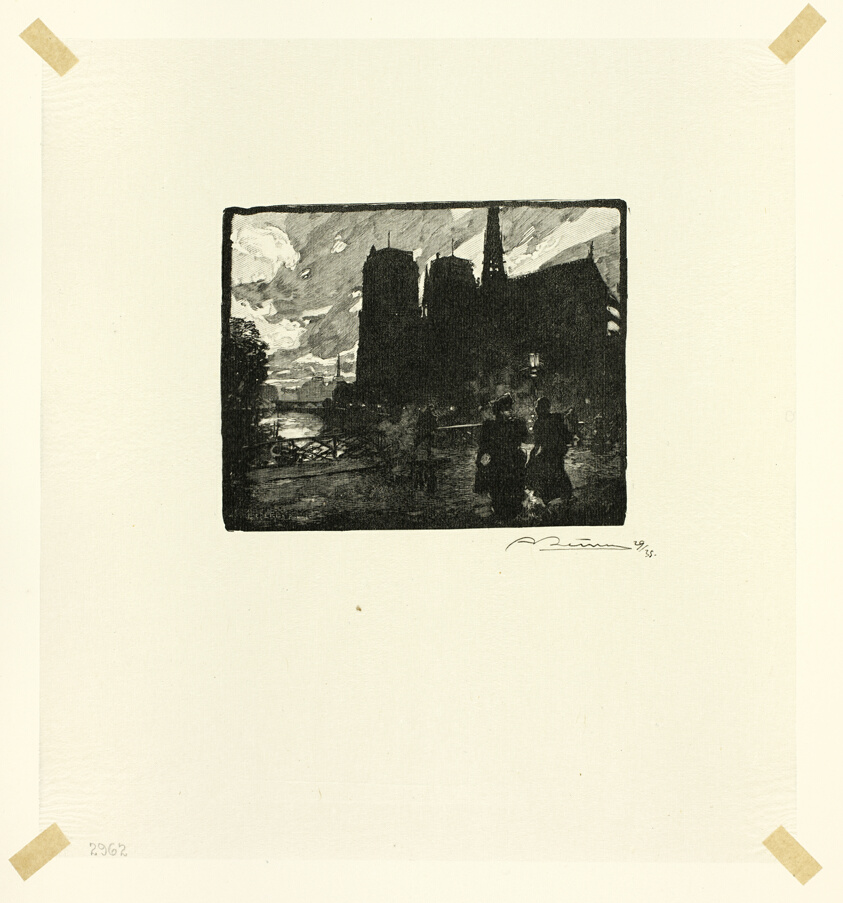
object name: Print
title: Notre-Dame, Evening, plate eight from Le Long de la Seine et des Boulevards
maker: Louis Auguste Lepère (French, 1849-1918); published by A. Desmoulins (French, active c. 1908-1910)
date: 1890, published 1910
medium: Wood engraving in black on cream Japanese tissue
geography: France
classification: wood engraving; print; prints and drawing